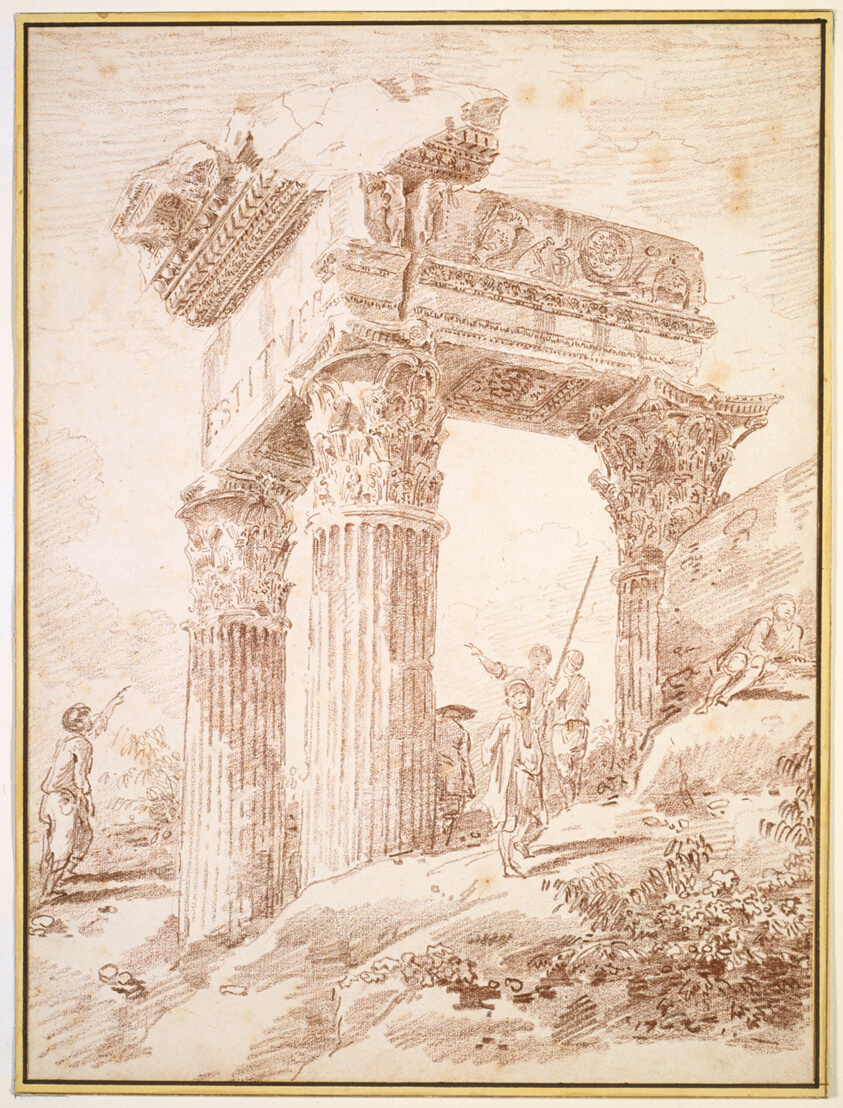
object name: Drawing and Watercolor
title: Temple of Vespasian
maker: Hubert Robert (French, 1733-1808)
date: 1762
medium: Red chalk on buff laid paper, laid down on cream laid card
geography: France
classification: chalk; drawings (visual works); prints and drawing